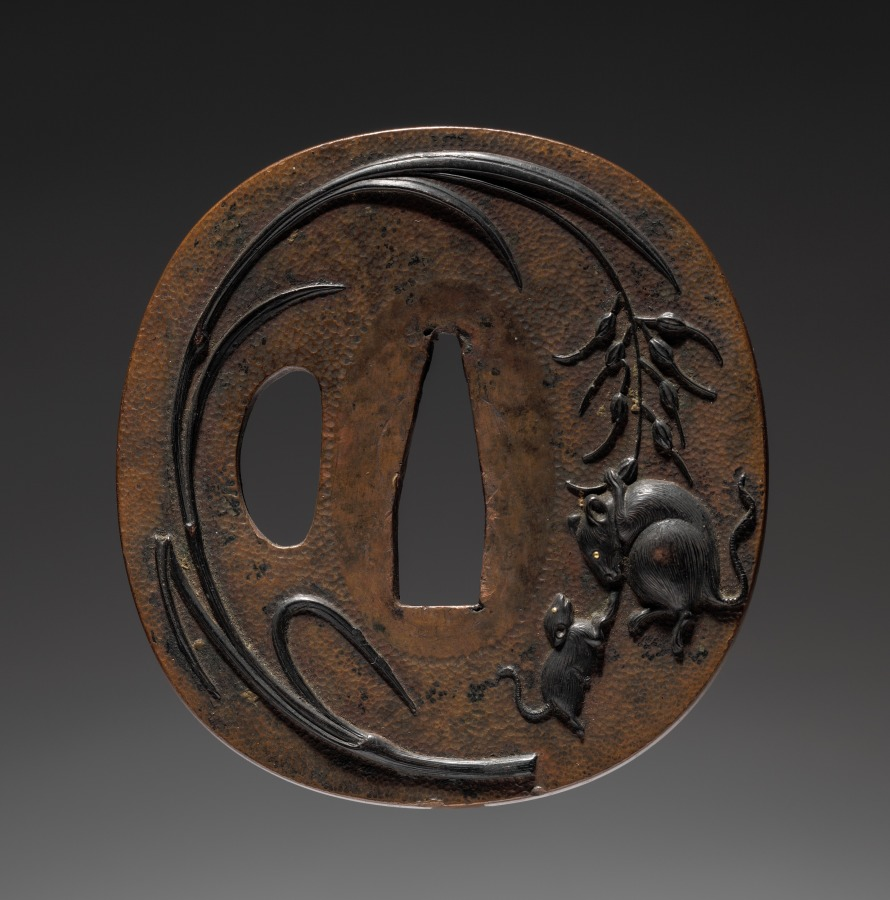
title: Sword Guard (Tsuba) with Mice and Rice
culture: Japan, possibly Edo period (1615-1868)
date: c. 1615–1868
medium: bronze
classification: Arms and Armor